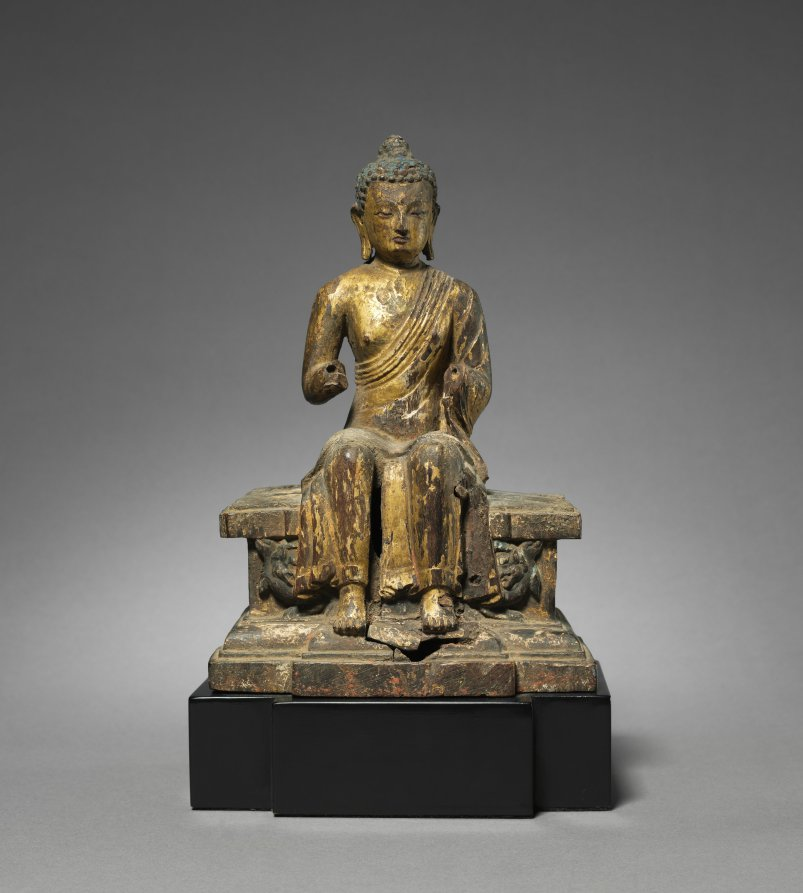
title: Figure of a Maitreya on a Tiered Pedestal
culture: Nepal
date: c. 1200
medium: gilded wood with polychrome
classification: Sculpture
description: The pendant legs of this image indicate that he is the next historical figure to achieve enlightenment and spread Buddhist teachings in a future time when the current historical Buddha's teachings will have been forgotten. Nepalese artists were famous for their skill in woodcarving. Since wood is scarce in Tibet, Nepalese woodworkers were invited to import materials and work in wealthy Tibetan monasteries and palaces and were important transmitters of styles and iconographies.